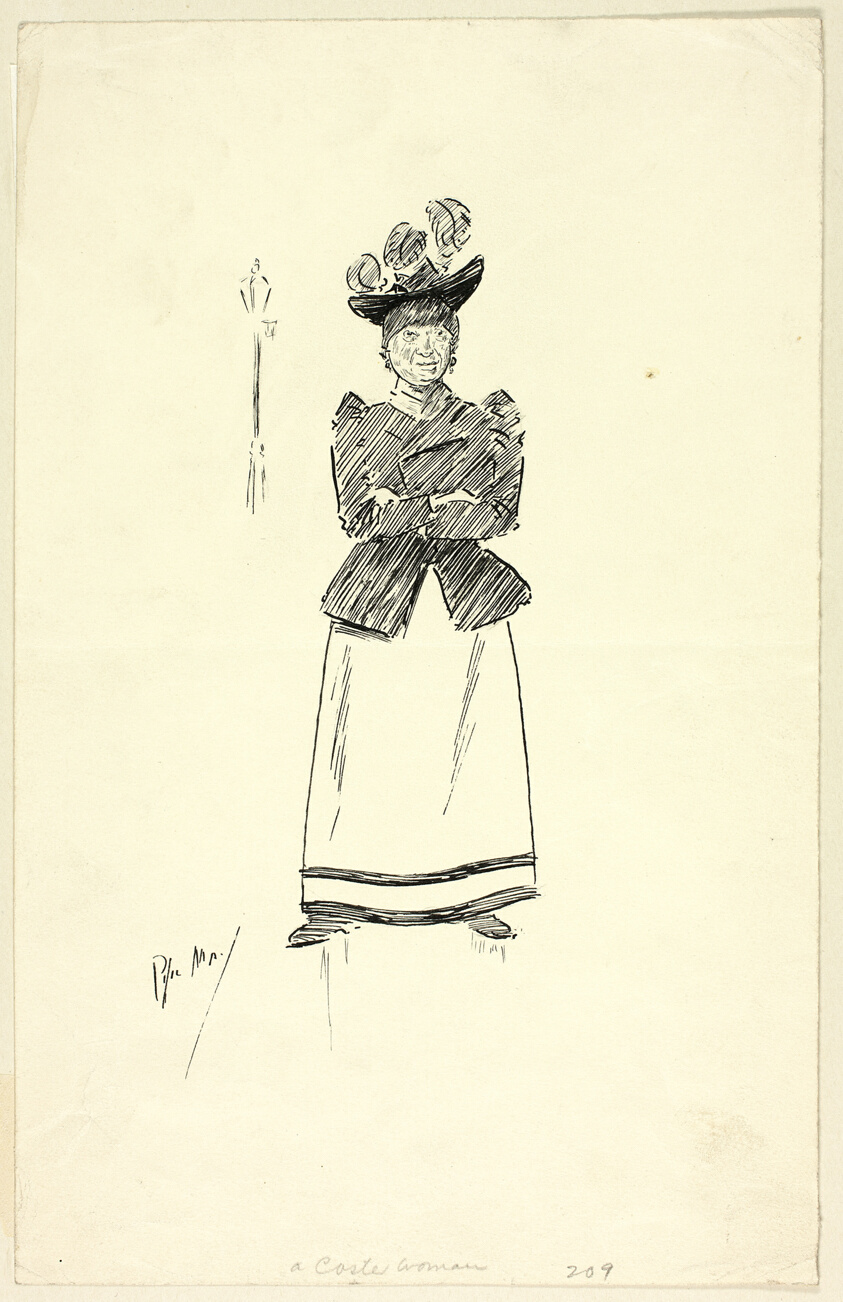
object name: Drawing and Watercolor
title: A Coster Woman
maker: Philipp William May; English, 1864-1903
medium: Pen and black ink over traces of graphite on cream wove paper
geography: England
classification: pen and ink drawings; drawings (visual works); prints and drawing